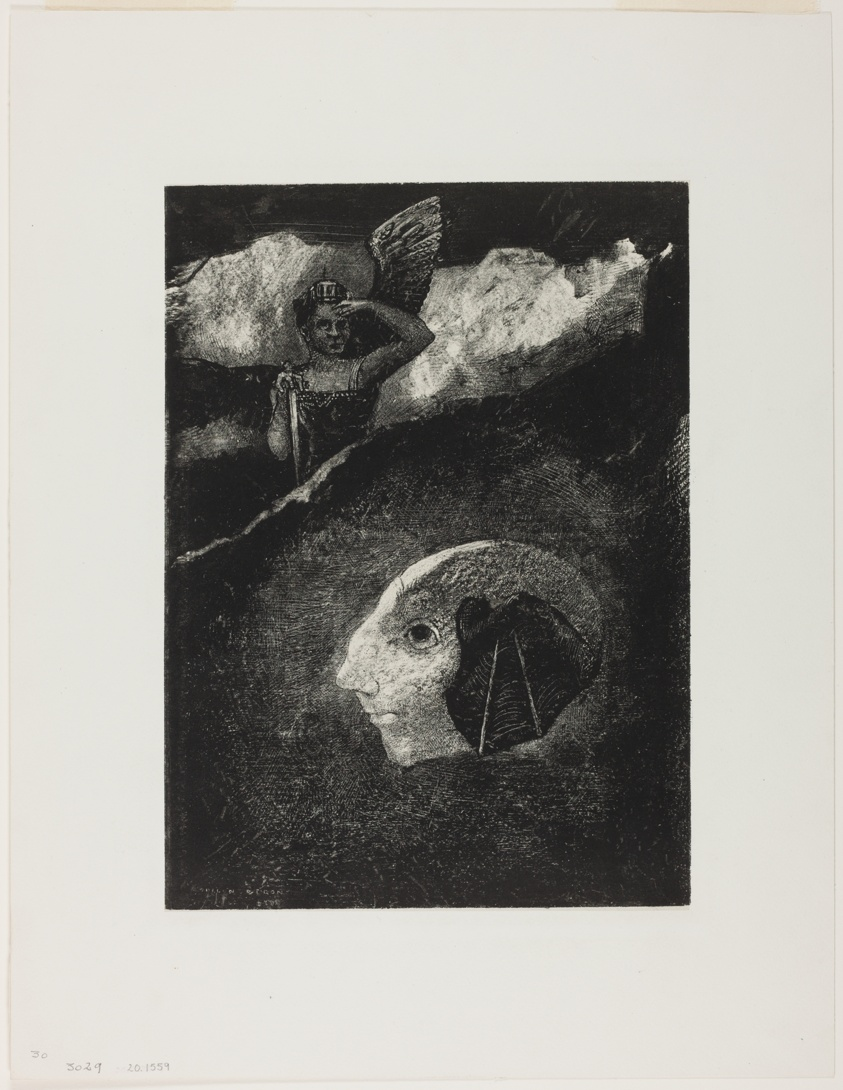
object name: Print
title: Limbo, plate four from In Dreams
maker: Odilon Redon (French, 1840-1916)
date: 1879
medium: Lithograph on mounted ivory China paper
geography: France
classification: lithograph; print; prints and drawing; paper